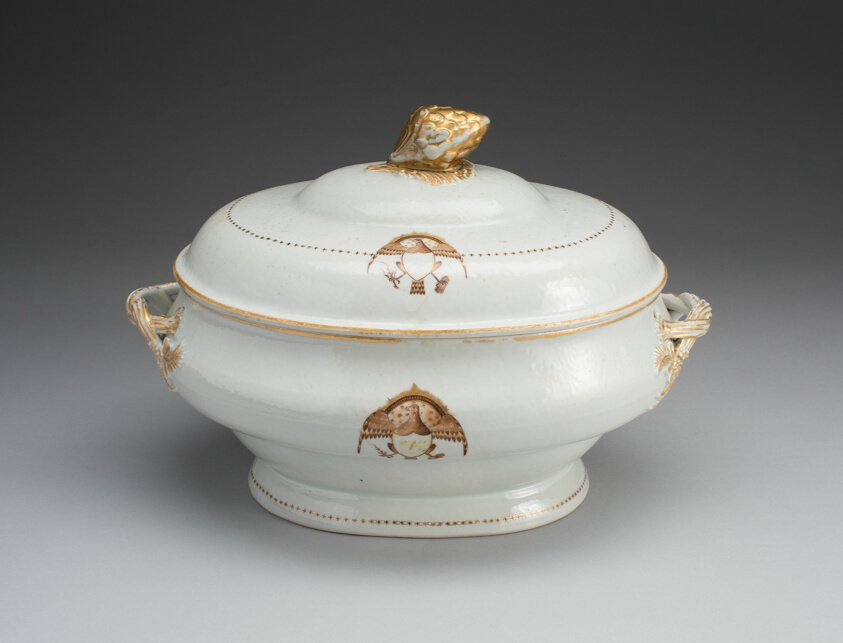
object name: Ceramics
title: Soup Tureen with Cover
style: chinese export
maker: Artist unknown (Chinese, made for the American market); China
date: 1700–1800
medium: Porcelain, enamels, and gliding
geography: China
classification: vessel for serving food; porcelain; art of the americas; ceramics; decorative arts; American market; chinese export porcelain; pottery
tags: eagles, eagle with shield